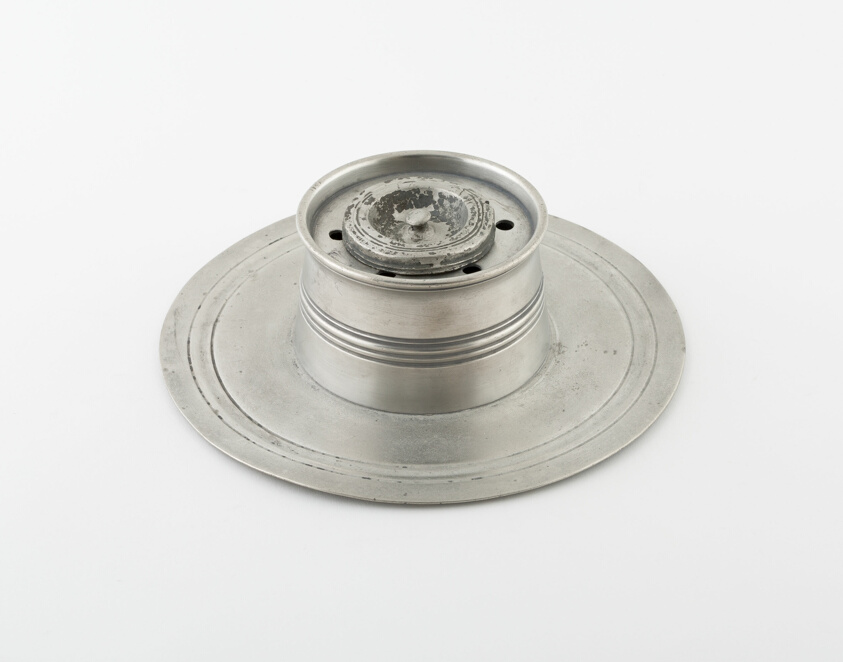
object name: Metalwork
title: Inkstand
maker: England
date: c. 1800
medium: Pewter and earthenware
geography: England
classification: pewter; metalwork; european decorative arts